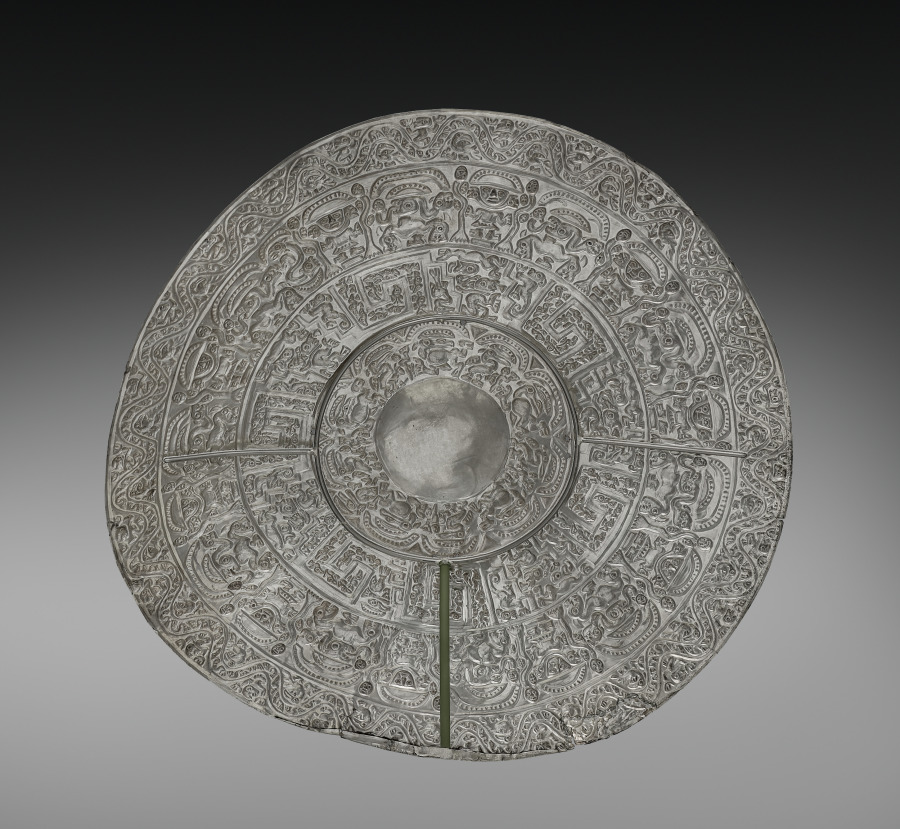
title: Disk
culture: Central Andes, Lambayeque or Chimú people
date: 850–1460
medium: Silver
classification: Silver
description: This disk belongs to a group of more than 20 similar disks pierced for attachment to a backing. The disks fall into four groups based on imagery. Here, each band features two alternating motifs: a human and a bird; a human and a zoomorphic creature; two geometric motifs, one filled with animals and the other with tiny birds; and two birds.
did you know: This disk could have been attached to a banner or a ceremonial shield.